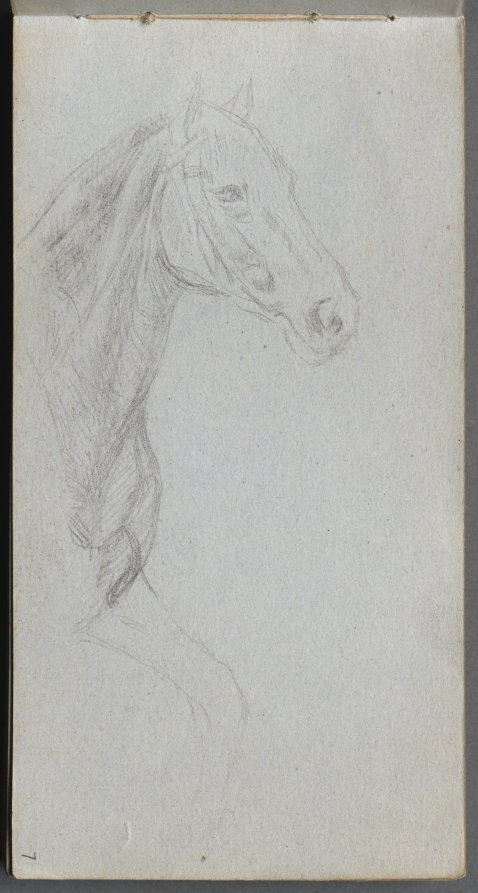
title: Sketchbook, page 7: Study of a Horse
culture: France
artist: Ernest Meissonier (French, 1815–1891)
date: c. 1860s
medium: graphite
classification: Bound Volume